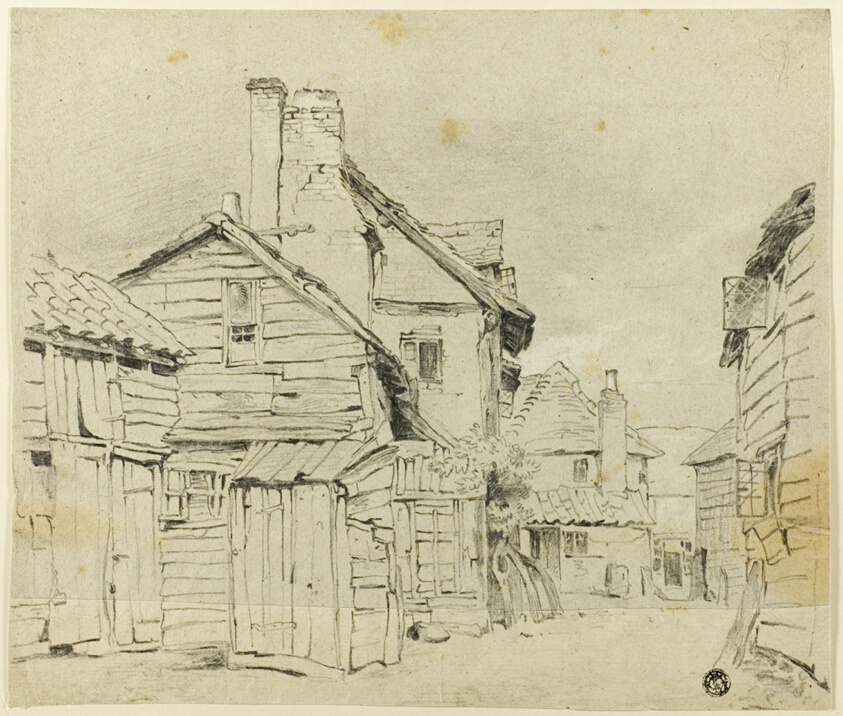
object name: Drawing and Watercolor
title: Water Lane, Watford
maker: Attributed to William Henry Hunt; English, 1790-1864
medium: Black crayon, heightened with white crayon, on gray wove paper, pieced to gray laid paper, tipped onto board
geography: England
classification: crayon; drawings (visual works); prints and drawing